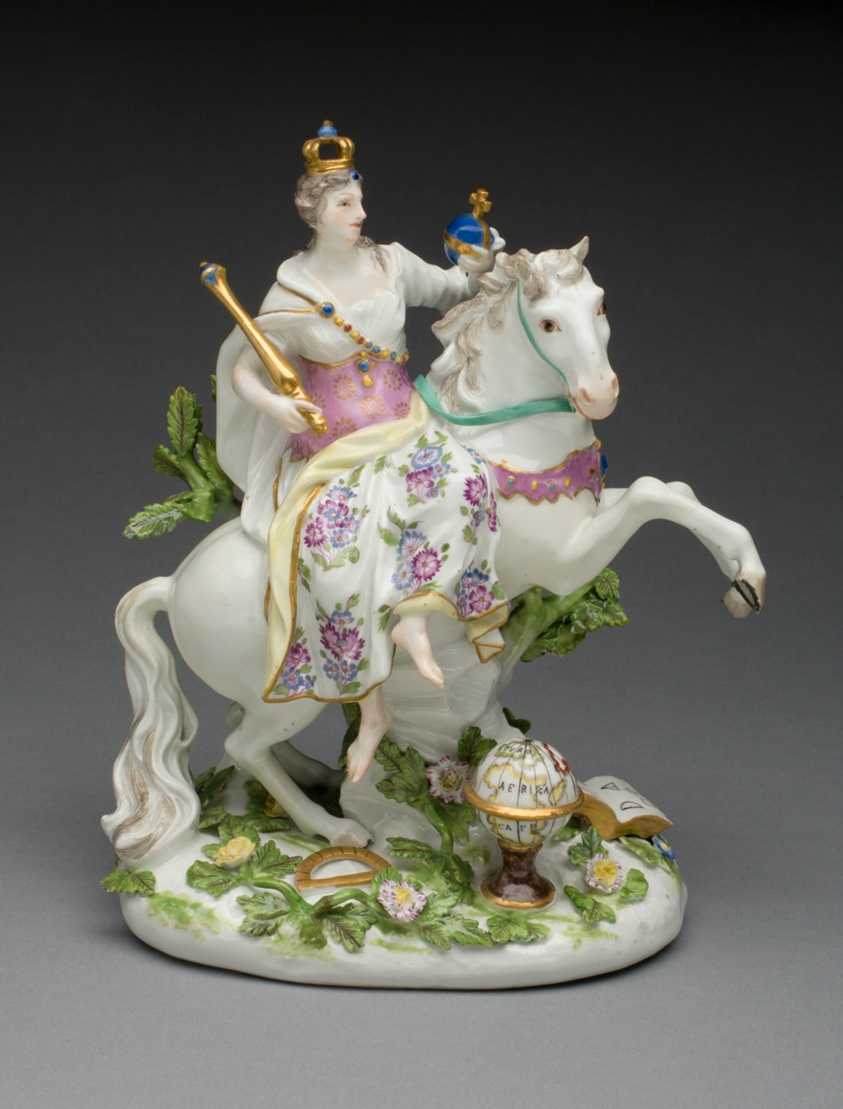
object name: Ceramics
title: Allegorical Figure Representing Europe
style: Rococo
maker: Meissen Porcelain Factory; Germany, founded 1710; Modeled by Johann Joachim Kändler; German, 1706-1775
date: 1746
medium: Hard-paste porcelain, polychrome enamels, and gilding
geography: Meissen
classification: sculpture; ceramics; porcelain; european decorative arts